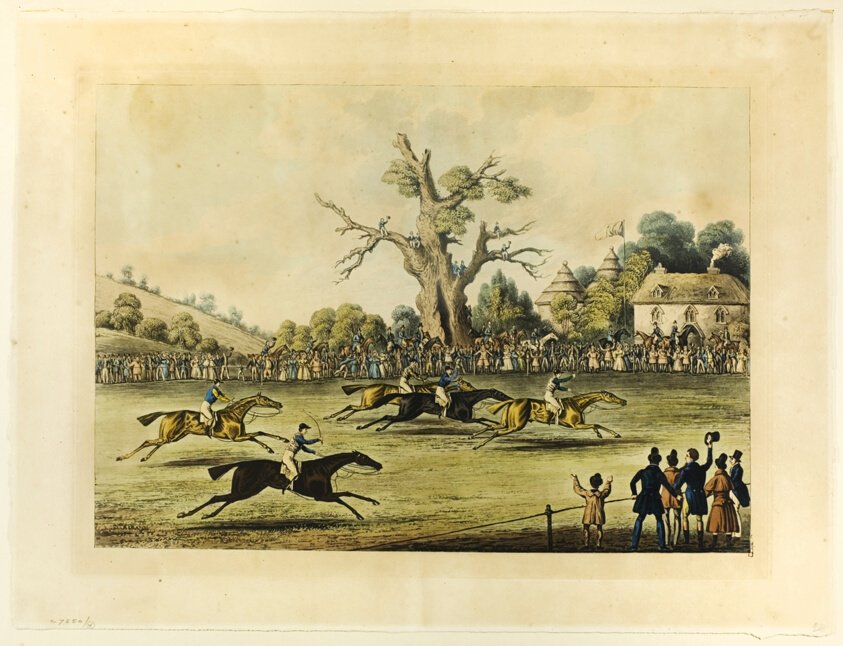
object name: Print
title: Saint Albans Grand Steeple Chase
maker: after James Pollard; English, 1797-1867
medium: Etching and aquatint, with hand-coloring, on paper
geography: England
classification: aquatint; print; prints and drawing